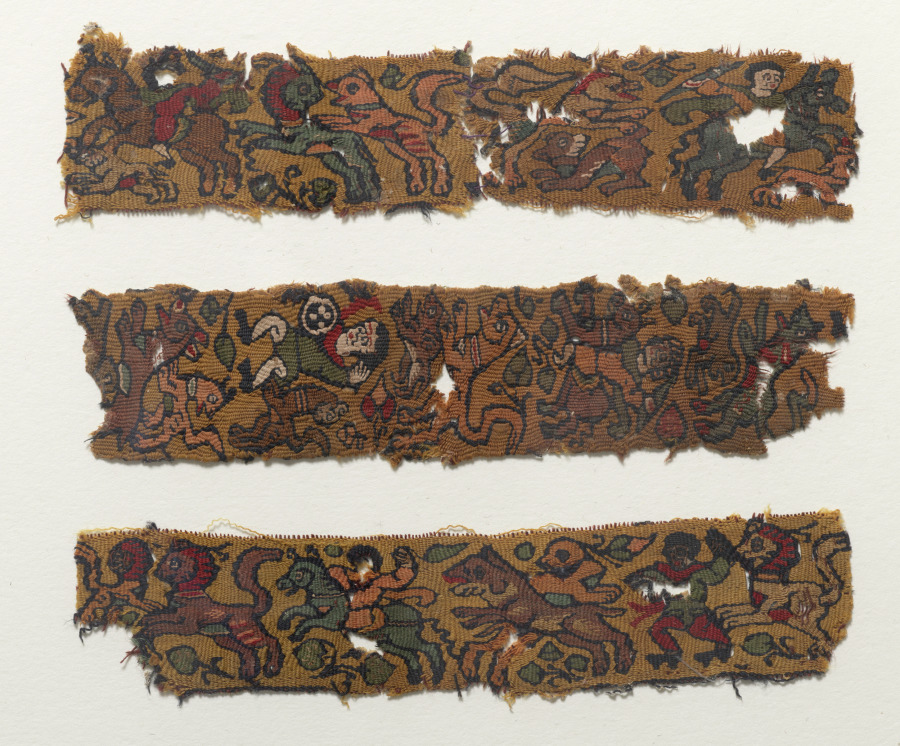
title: Three Fragments from a Border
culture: Egypt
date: before 1968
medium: tapestry weave; wool and linen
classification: Textile